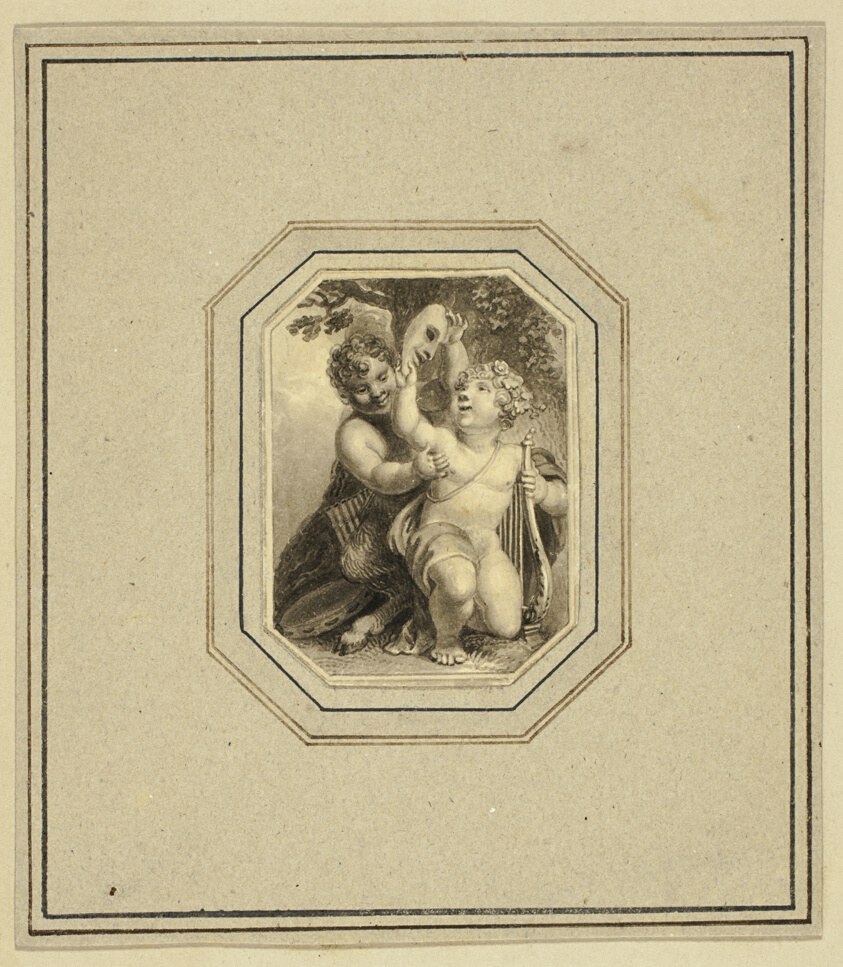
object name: Drawing and Watercolor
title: Comedy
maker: William Marshall Craig (English, c. 1765-c. 1834)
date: 1804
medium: Pen and gray wash on cream wove paper, laid down on cream card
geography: England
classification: ink or chalk wash; drawings (visual works); prints and drawing